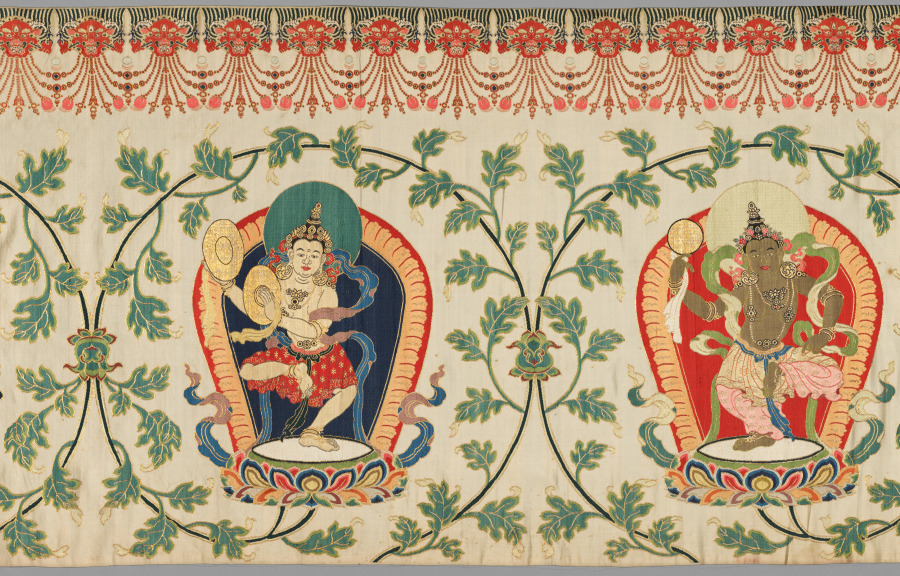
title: Brocaded Strip, known as "Imperial Tribute Brocade"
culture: China, Qing dynasty (1644-1911)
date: c. 1770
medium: brocaded satin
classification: Textile